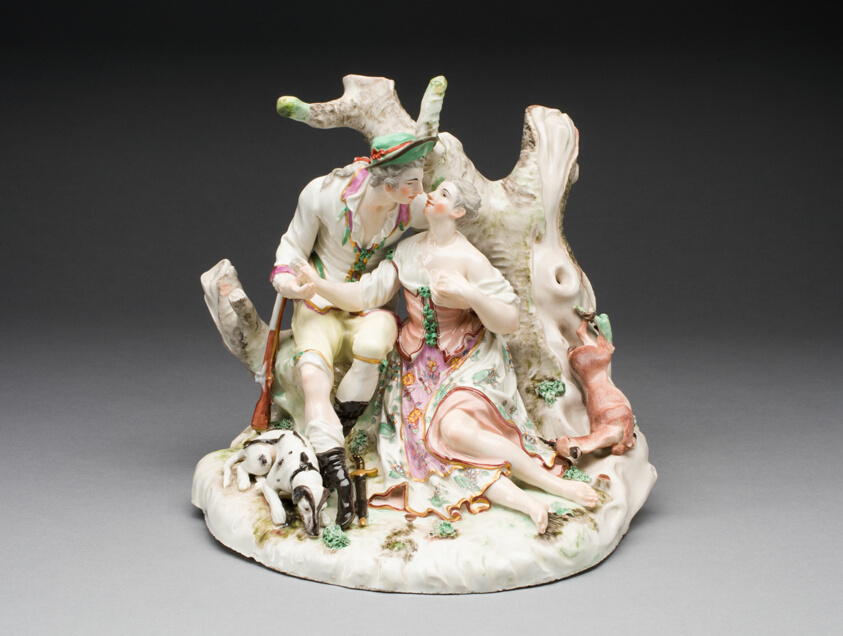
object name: Ceramics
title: Group: Hunters or Lovers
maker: Ludwigsburg Porcelain Factory; German, 1756-1824; Naselmeyer; German, 18th century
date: c. 1765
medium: Hard-paste porcelain, polychrome enamels, and gilding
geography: Ludwigsburg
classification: sculpture; porcelain; european decorative arts; ceramics